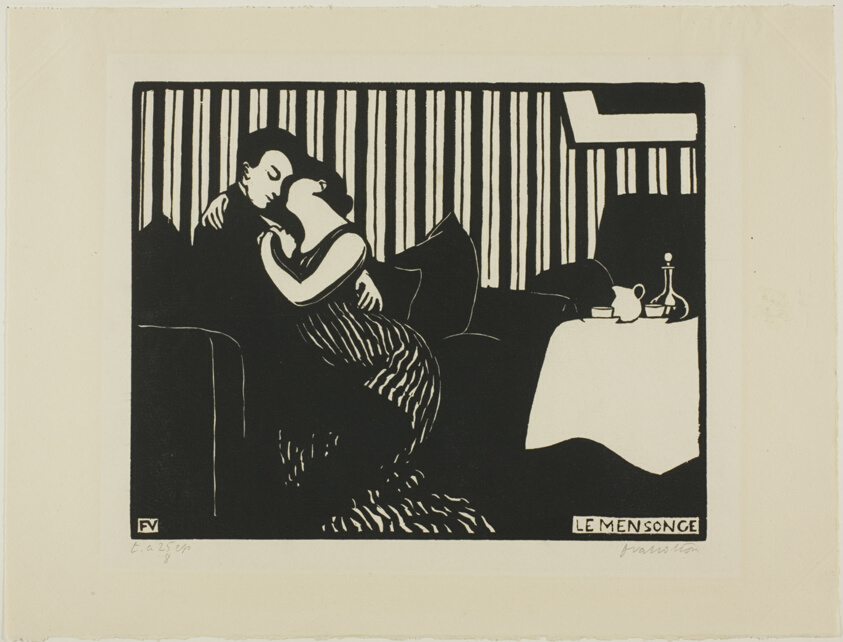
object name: Print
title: The Lie, plate one from Intimacies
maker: Félix Edouard Vallotton (French, born Switzerland, 1865-1925); published by La Revue blanche (French, 19th-20th century)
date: 1897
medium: Woodcut in black on cream wove paper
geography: France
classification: woodcut; print; prints and drawing